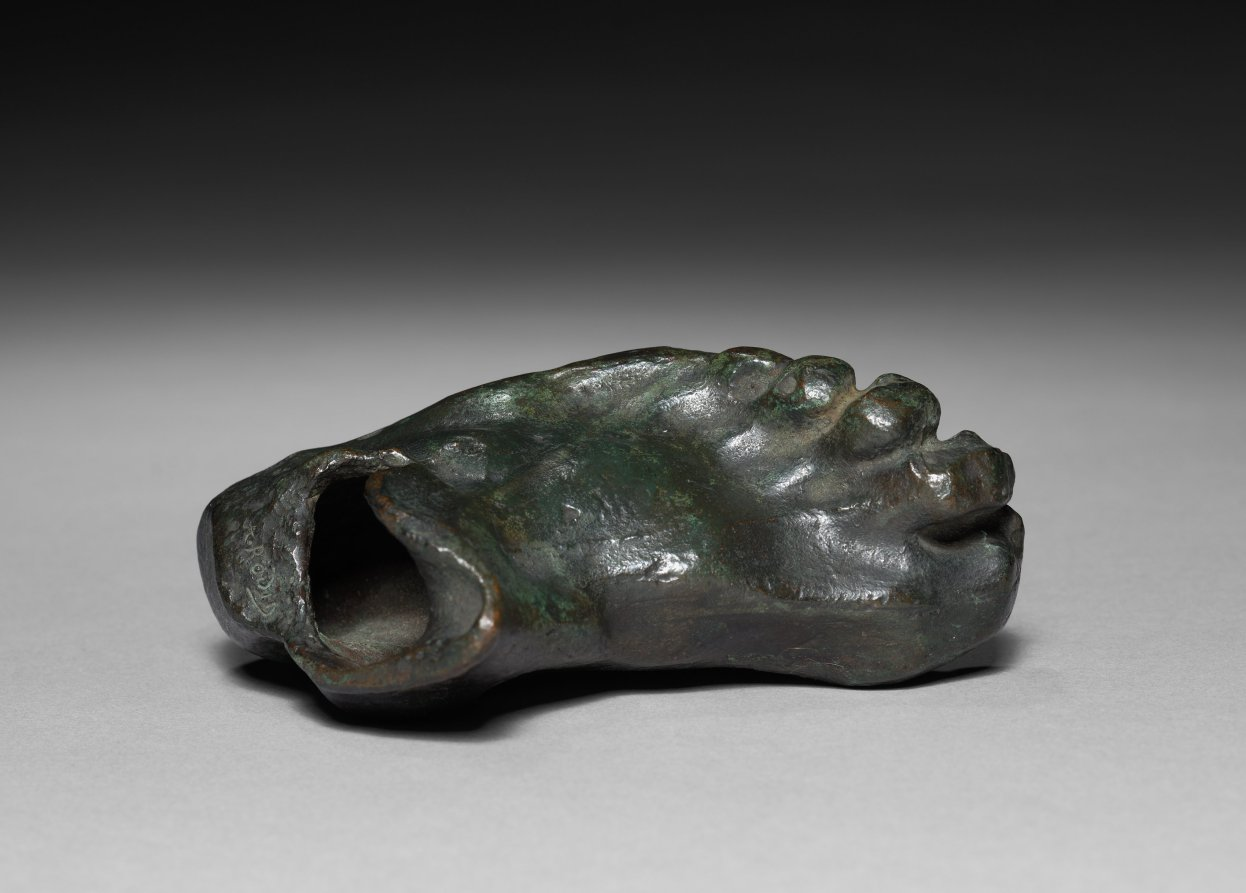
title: Model of a Foot (left foot)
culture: France, late 19th-early 20th Century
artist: Auguste Rodin (French, 1840–1917)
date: c. 1880 – 1917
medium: bronze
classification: Sculpture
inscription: Signed: "A. Rodin"